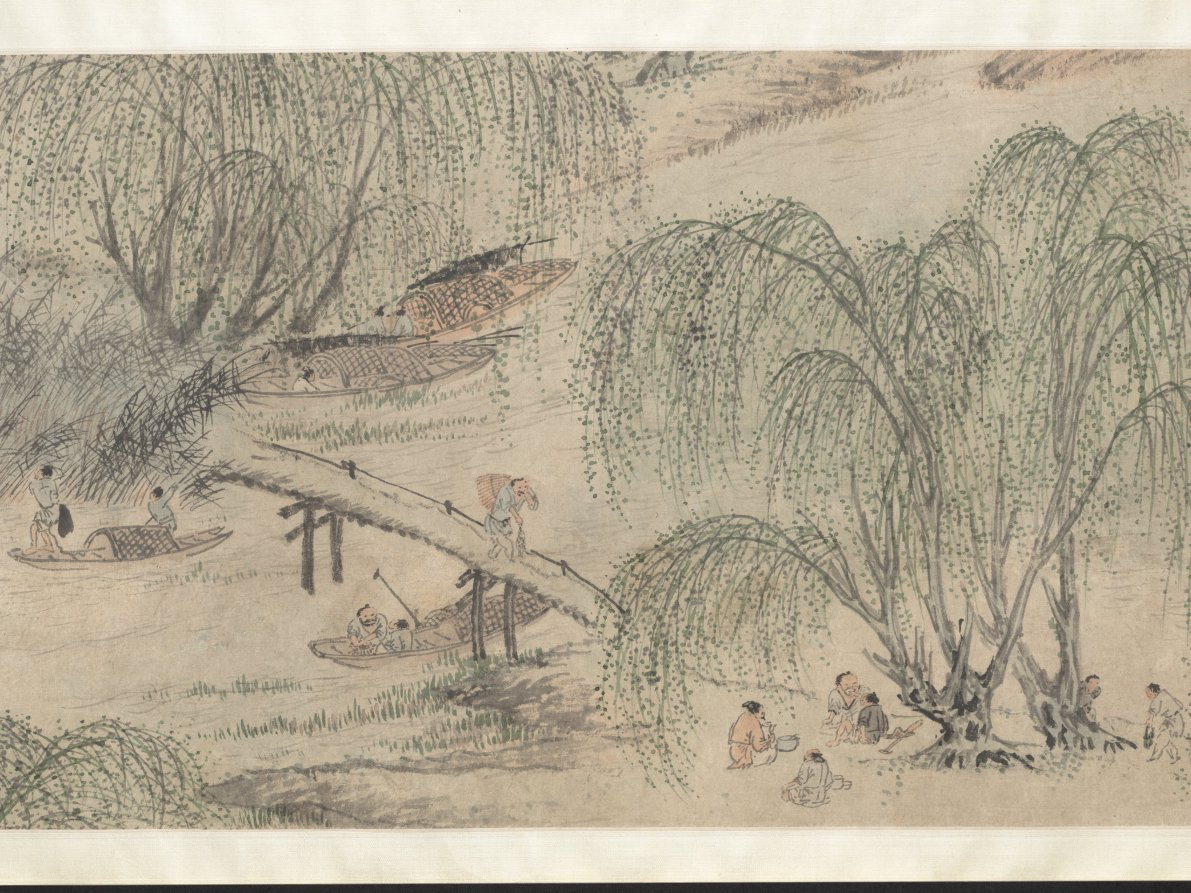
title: Fisherman's Joy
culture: China, Ming dynasty (1368–1644)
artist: Qian Gu (Chinese, 1508–c. 1578)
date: 1572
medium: Handscroll; ink and light color on paper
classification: Painting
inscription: Artist's inscription, signature, and seal: On the autumn day of the jen-shen year [1572], P'eng-ch'eng, Ch'ien Ku painted [this]. [seal] Hsüan-ch'ing shih. 2 colophons, both dated 1689, and 5 additional seals of Yün Shou-p'ing (1633-1690).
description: This painting has a scene showing two small crafts, each manned by two fishermen, practicing a traditional fishing method. In one of them, a man uses a bamboo pole to direct the movements of a cormorant bird sent into the water. Cormorant fishing, witnessed in some areas of the lower Yangzi River, appears in Zhe school paintings. Qian Gu may have borrowed these narrative figure scenes from Zhe school paintings, while his vantage point, brushwork, and soft tones align with the Wu school style. Scenes of fishermen appealed to urban and educated audiences who idealized the self-sufficient independence of fisherfolk.